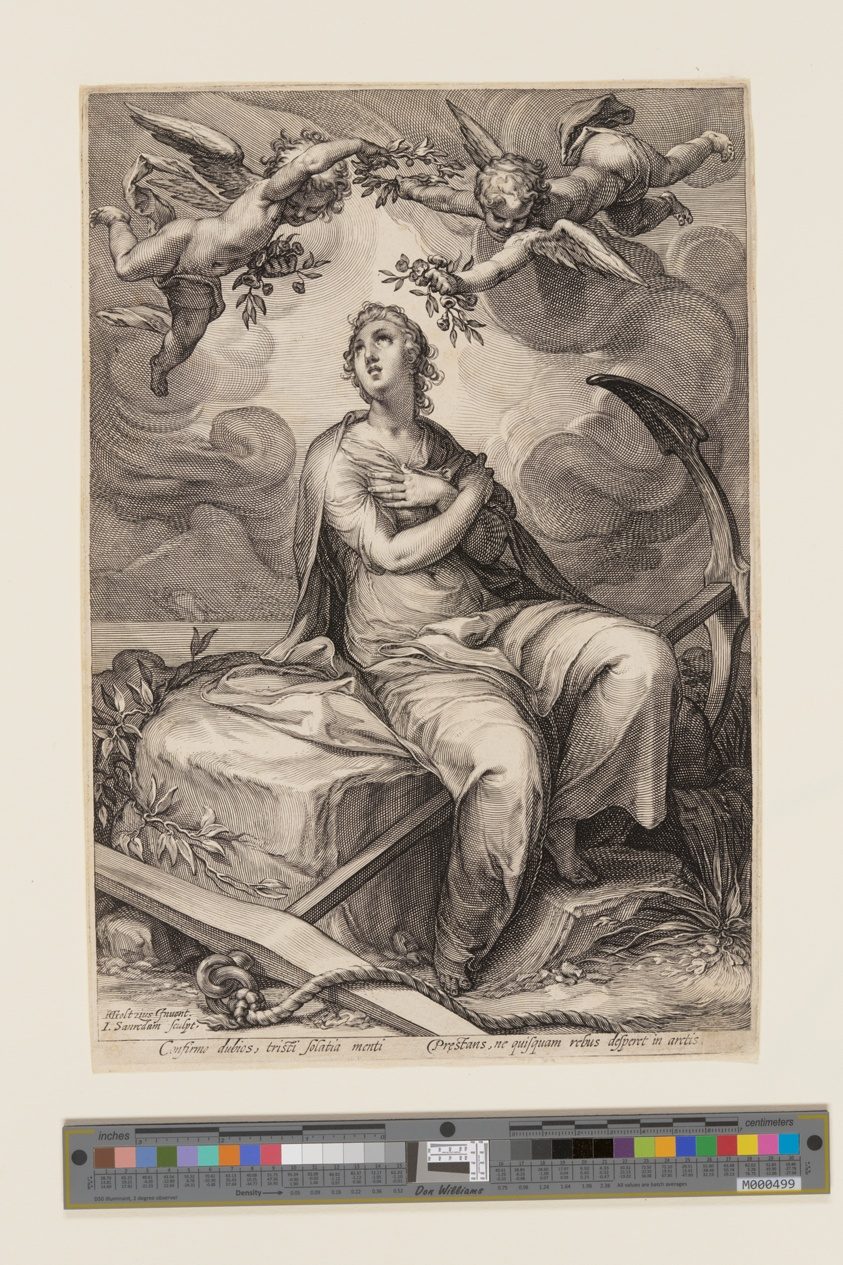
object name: Print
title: Hope, from Three Cardinal Virtues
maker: Jan Saenredam (Dutch, 1565–1607); after Hendrick Goltzius (Dutch, 1558–1617)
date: 1601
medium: Engraving on ivory laid paper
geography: Netherlands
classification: engraving; paper; print; prints and drawing